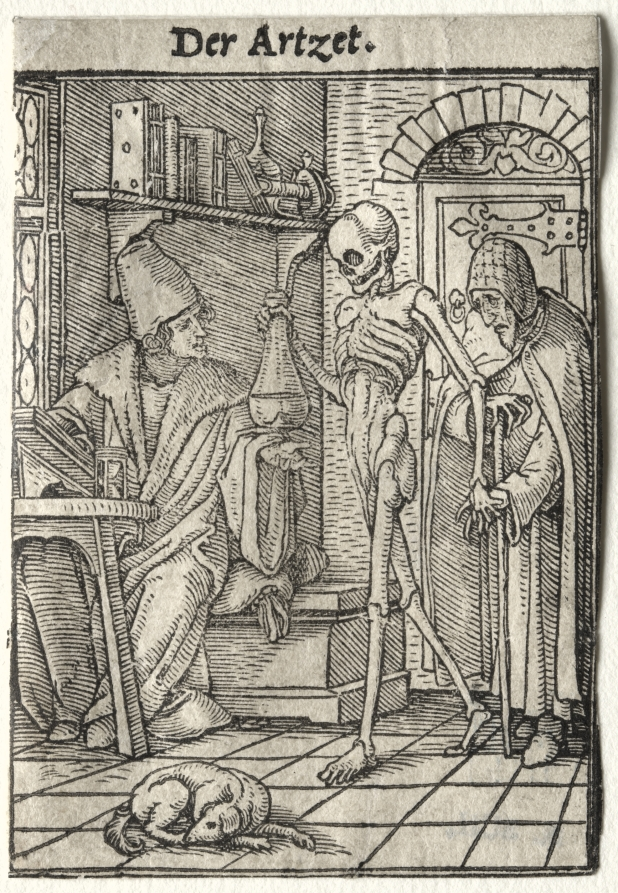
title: Dance of Death: The Doctor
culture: Germany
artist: Hans Holbein the Younger (German, active England and Switzerland, 1497/98–1543)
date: c. 1526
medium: woodcut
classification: Print